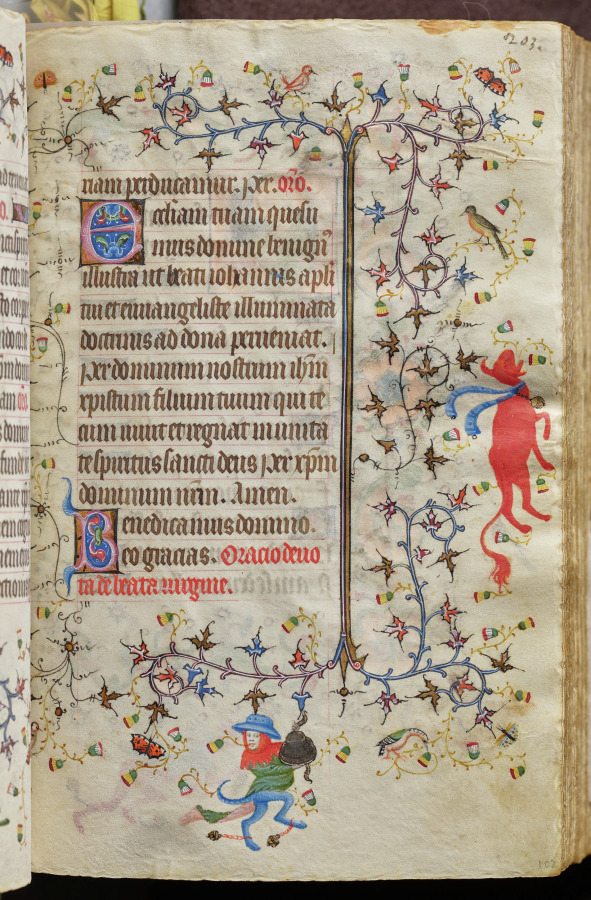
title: Hours of Charles the Noble, King of Navarre (1361-1425): fol. 102r, Text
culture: France, Paris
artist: Master of the Brussels Initials and Associates (French)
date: c. 1405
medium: ink, tempera, and gold on vellum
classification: Bound Volume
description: This precious volume was obviously highly prized by its owner, the French-born King of Navarre, who had his coat of arms painted on no less than twenty folios. Rather than directly commissioning this manuscript from a specific workshop, it seems that Charles the Noble acquired his book of hours -- perhaps ready-made for the luxury market -- while on a trip to Paris in 1404-05. A collaborative effort, six painting styles are evidenced within the pages of this codex, those of two Italians, two Frenchmen, and two Netherlanders. The painter who was responsible for the planning and decoration of the book, and who produced seventeen of the large miniatures, was a Bolognese artist known as the Master of the Brussels Initials. His principal assistant, responsible for most of the borders, was a Florentine who signed his name "Zecho" da Firenze on folio 208 verso.